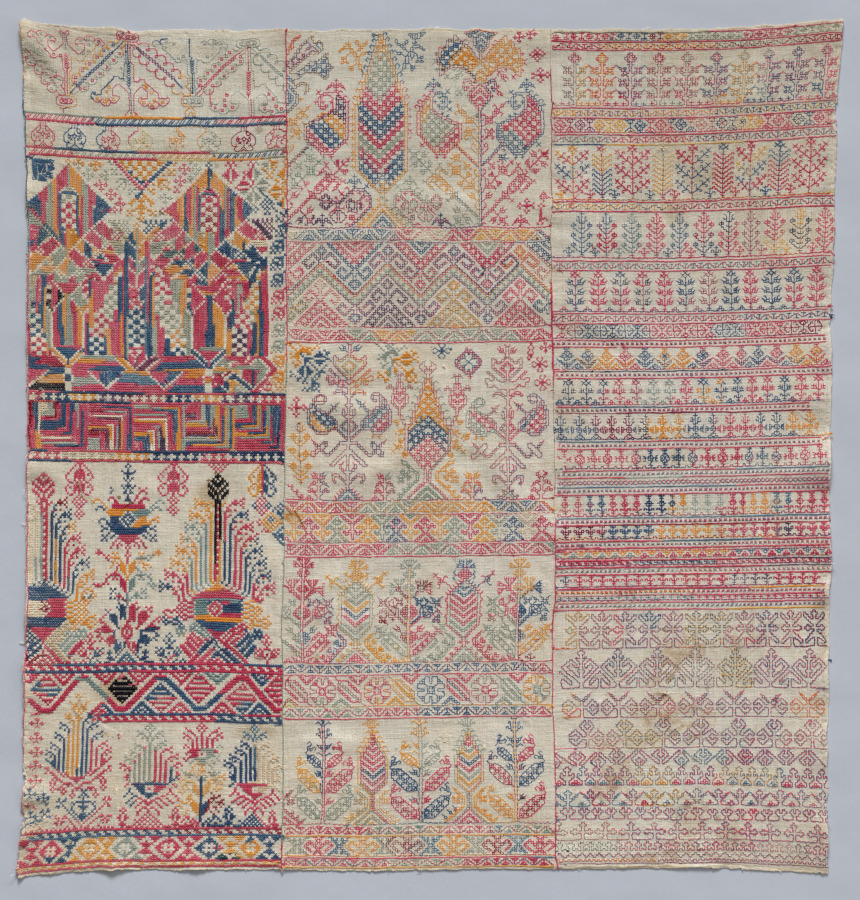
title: Embroidery Sampler (Chelliga/Shelliga)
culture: Africa, North Africa, Morocco, Salé, Moroccan embroiderer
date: 1800s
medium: Cotton, silk, dye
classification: Sampler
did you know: Upon completing their training, professionally trained young women would produce a sampler as a “diploma” testifying to their embroidery skills.